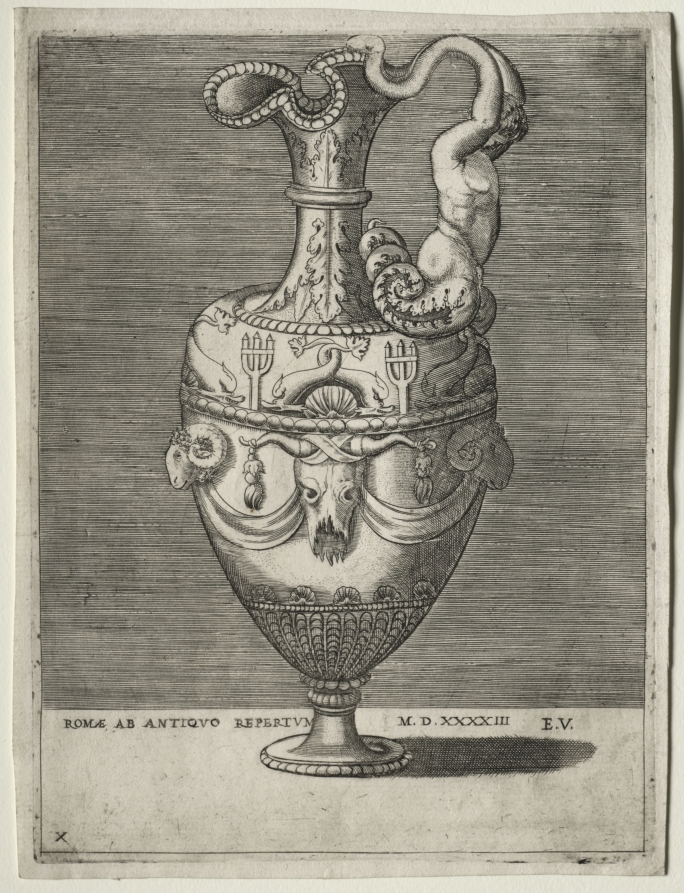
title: Ewer Ornamented with Dolphins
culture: Italy, 16th century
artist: Enea Vico (Italian, 1523–1567)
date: 1543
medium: engraving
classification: Print